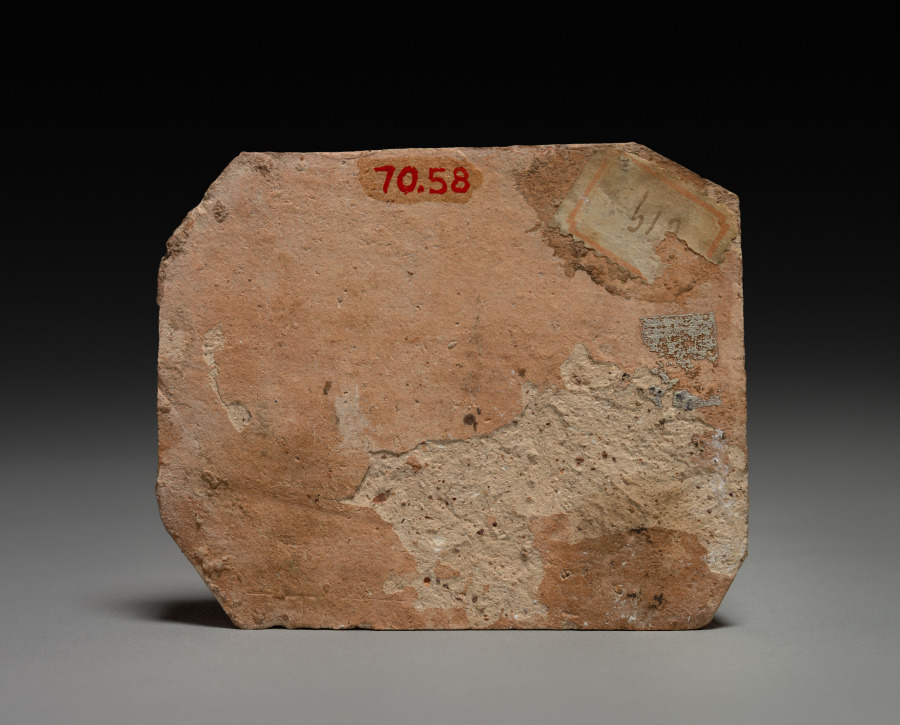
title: Groom (Tomb Figure)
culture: China, Sui dynasty (581-618) - Tang dynasty (618-907)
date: late 500s–early 600s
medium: buff earthenware with polychromy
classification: Sculpture